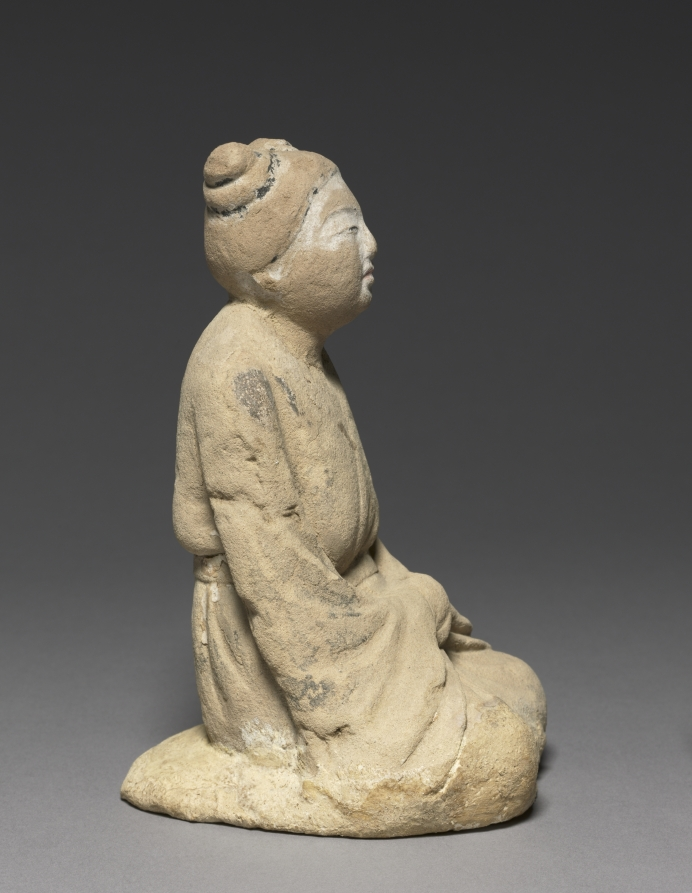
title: Woman from an Audience Scene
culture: Japan, Asuka period (538-710) to Nara period (710-94)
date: mid-600s to early 700s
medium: unfired clay with color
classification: Sculpture